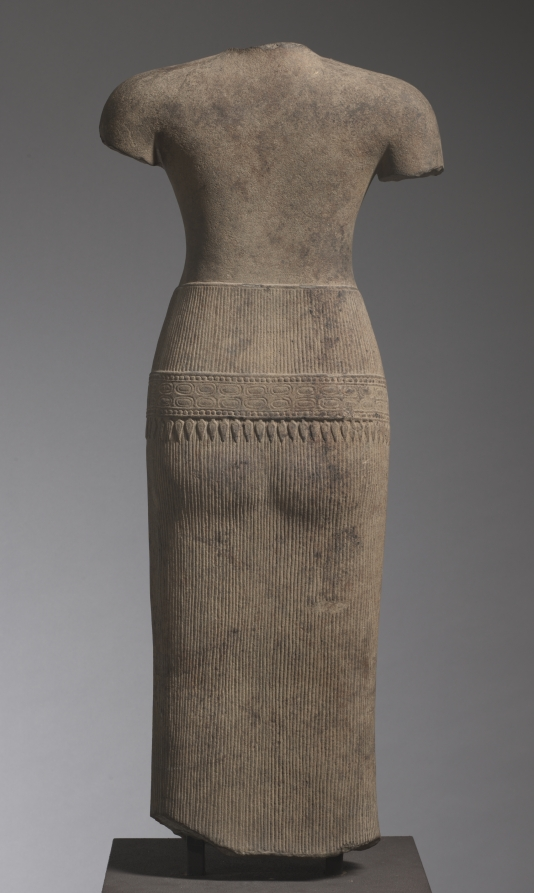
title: Standing Female Figure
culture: Cambodia, Angkor, Baphuon, Angkorean Period (877-1431)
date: 1050–75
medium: sandstone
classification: Sculpture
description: Though many iconographic elements were adopted from India, Khmer sculptors resisted the exaggerated voluptuous form of Indian female figures. They maintained the subtler figural styles that convey a distinctively Khmer ideal of the female form. This sculpture exemplifies the figural style and mode of dress of the Baphuon sculptures, a royal temple in Angkor built by King Udayadityavarman II (reigned 1050-1066). Since other figures from the Baphuon depict images of or related to Shiva, it is possible to identify this female figure as his wife Parvati.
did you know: The figure wears an elaborate belt decorated with pendants around her sarong.